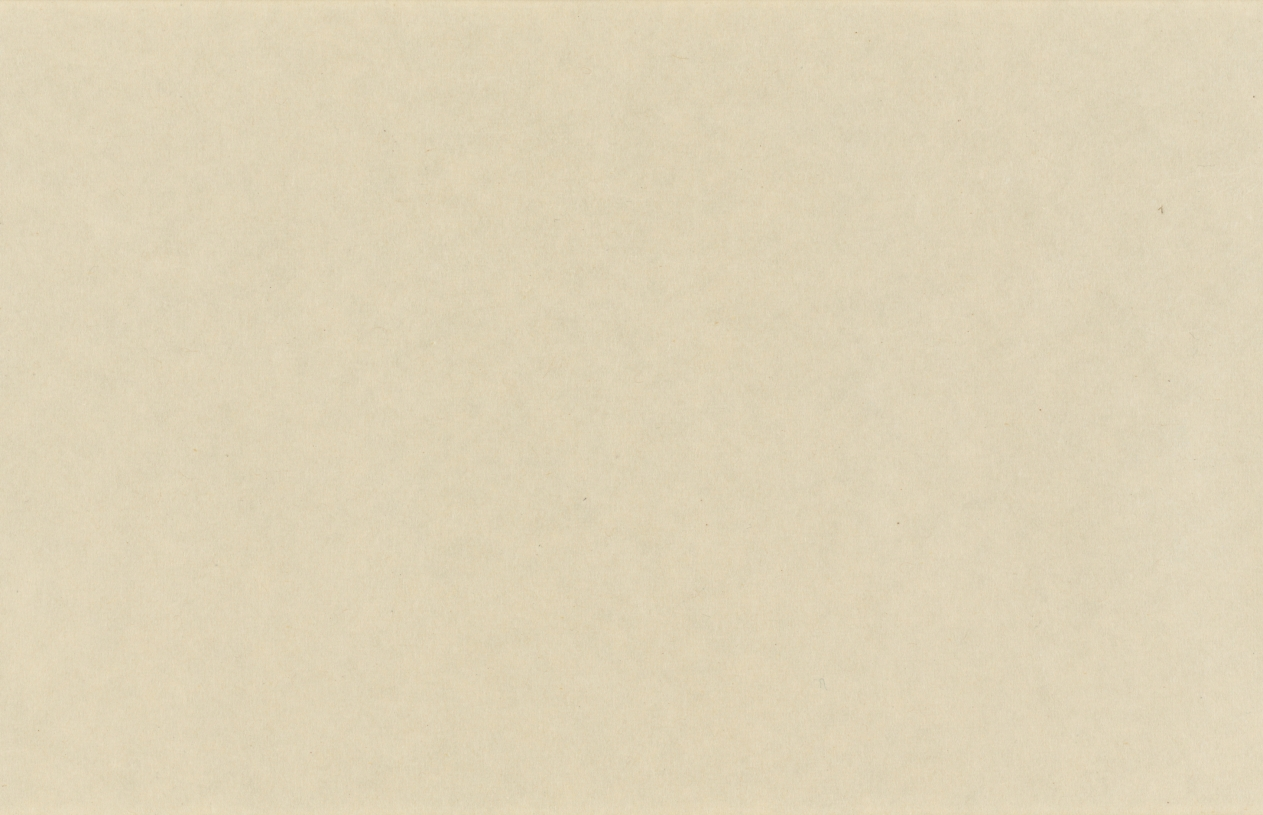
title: Eight Views of Xiao-Xiang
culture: Japan, Muromachi period (1392–1573)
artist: Sesson Shūkei (Japanese, c. 1492–c. 1577)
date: 1500s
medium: handscroll; ink on paper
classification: Painting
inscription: Signature and seal of artist at end of painting.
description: Eight Views of the Xiao and Xiang Rivers can be traced to 11th-century Chinese poems and paintings, the depiction of which had also become popular among Korean and Japanese painters. Xiao-Xiang refers to the region in present-day Hunan province where the Xiao and Xiang rivers converge. Few painters of the Eight Views had in fact seen the scenery; rather, they were trying to portray in ink and wash the lyrical qualities of dim light and a misty atmosphere typical of that region. Each of the poetic titles suggests a time of day, a season, or specific atmospheric conditions—subjects that challenged the abilities of the most talented artists. In this miniature painting (shukuzu) of the Muromachi period, Japanese Zen monk and painter Shukei Sesson depicted all eight views featured in Chinese prototypes: Wild Geese Descending to Sandbar; Returning Sails Off a Distant Coast; Mountain Market in Clearing Mist; River and Sky in Evening Snow; Autumn Moon over Dongting Lake; Night Rain on the Xiao and Xiang; Evening Bell from Mist-Shrouded Temple; and Fishing Village in Evening Glow.